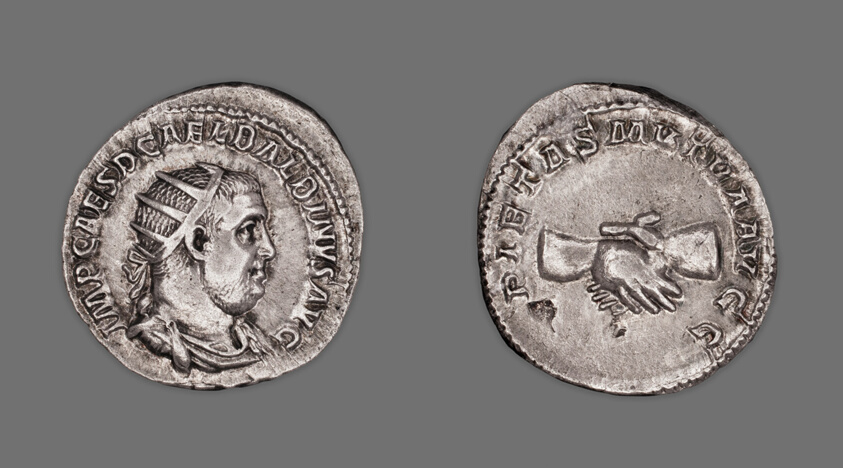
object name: Coin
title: Antoninianus (Coin) Portraying Emperor Balbinus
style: roman (ancient, style or period), ancient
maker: Roman, minted in Rome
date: 238 (April-June), issued by Balbinus and Pupienus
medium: Silver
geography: Rome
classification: coin; ancient art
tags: portraits